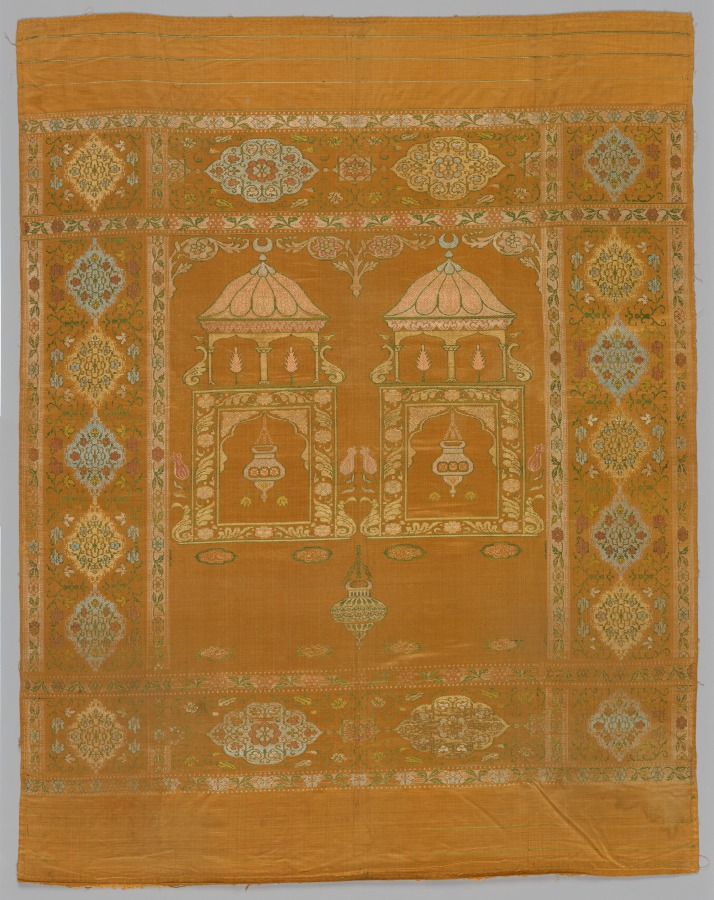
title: Coverlet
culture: Turkey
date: 1800s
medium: silk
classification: Textile